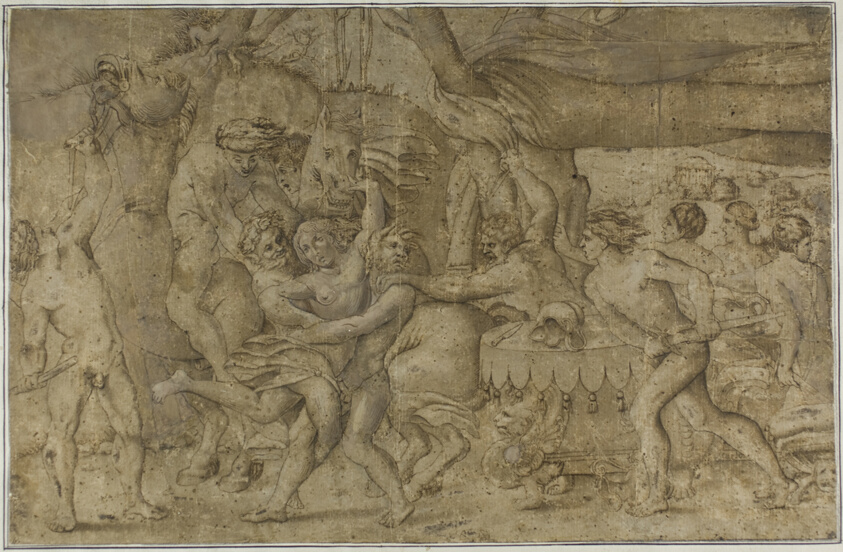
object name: Drawing and Watercolor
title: Battle of the Lapiths and Centaurs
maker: After Enea Vico; Italian, 1523-1567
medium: Pen and brown ink, with brush and brown wash and gray gouache, on tan laid paper, laid down on ivory laid paper, laid down on blue wove paper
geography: Italy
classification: ink with wash; drawings (visual works); prints and drawing